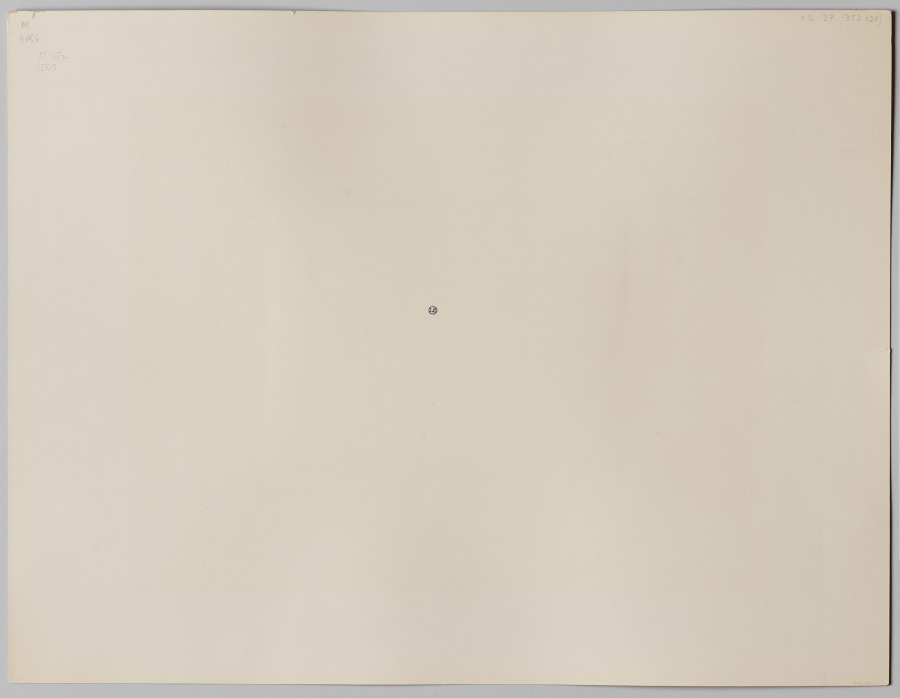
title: Church with Round Tower, Pompeii, Italy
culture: Italy, 19th century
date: c. 1860s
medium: albumen print from collodion negative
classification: Photograph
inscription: Written in pencil on verso: "PH/ 9054/ IT-272/ 1500"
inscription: Written in pencil on verso: "AD 137 / 353 (28)"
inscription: Stamped in black ink on verso:"I.C.(circled)"